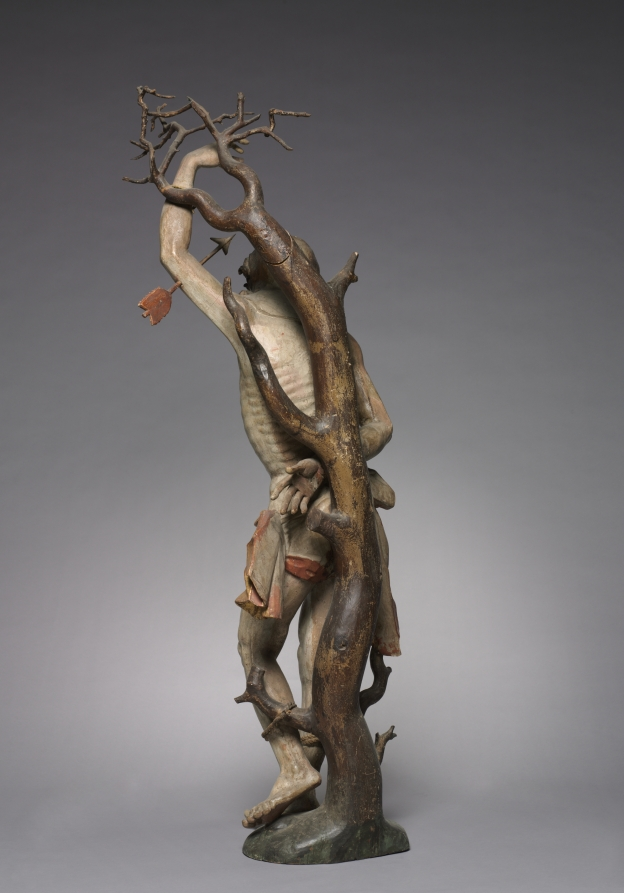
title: Saint Sebastian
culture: Germany, early 17th century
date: c. 1600–1620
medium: painted and gilded wood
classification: Sculpture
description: An early Christian saint and martyr, Sebastian was condemned to death by the Roman emperor Diocletian. Bound to a tree and shot with arrows, he survived—only later to be martyred by beating. This figure embodies the blend of stylistic influences that characterized German sculpture in the early 1600s. The graceful pose and anatomical naturalism of the legs indicate the influence of Italian Mannerism, while the crisp, stylized patterns of Sebastian’s hair and loincloth recall German Gothic works from the 1400s. The tree to which Sebastian is bound is an actual branch, shaped and refined to its present appearance.